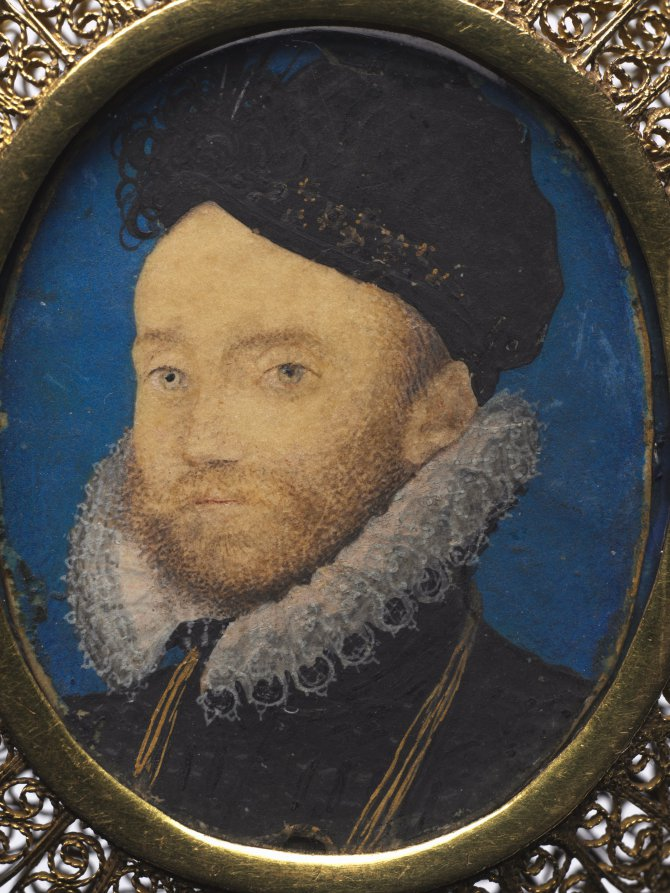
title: Portrait of a Man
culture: England, late 16th century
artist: Nicholas Hilliard (English, c. 1547–1619)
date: 1590s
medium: watercolor on vellum in a later gilt metal frame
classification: Portrait Miniature